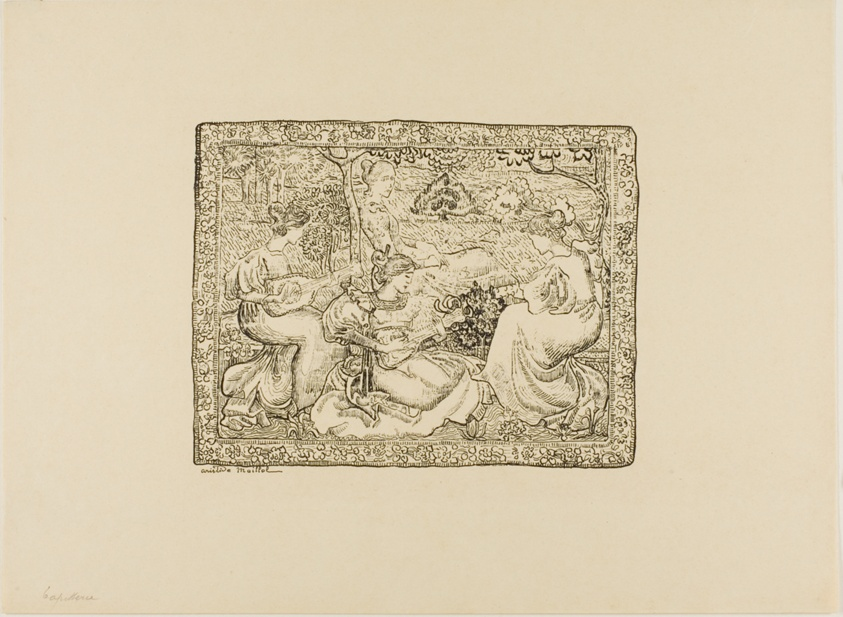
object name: Print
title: Tapisserie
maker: Aristide Joseph-Bonaventure Maillol (French, 1861-1944)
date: 1895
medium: Zincograph in black on buff wove paper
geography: France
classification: zincograph; print; prints and drawing